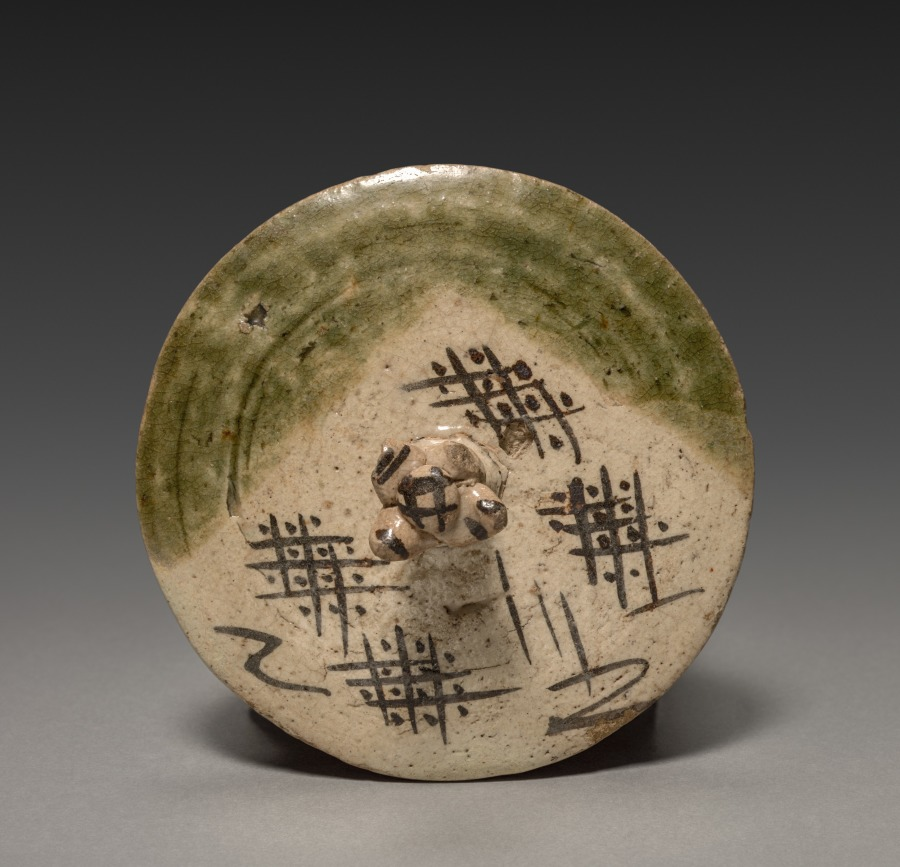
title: Ewer (Suichū) (lid)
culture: Japan, Momoyama period (1573–1615)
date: early 1600s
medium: Glazed stoneware with iron oxide underglaze slip (Mino ware, Oribe type)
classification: Ceramic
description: This ewer was made to replenish the jar that holds water for rinsing teabowls and filling the iron kettle at tea gatherings. Highly abstracted pine trees, cascading ivy, stripes, and grids make up the designs in underglaze iron oxide, while the overall surface alternates between a transparent glaze and a green glaze characteristic of some Oribe tea wares.